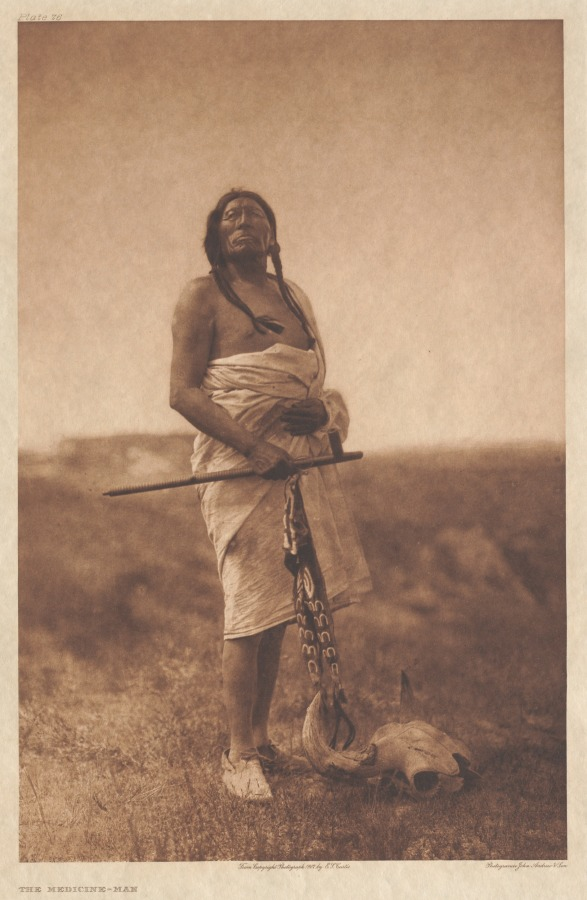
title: Portfolio III, Plates 76-110, 119, 136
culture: America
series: The North American Indian: being a series of volumes picturing and describing the Indians of the United States, The Dominion of Canada, and Alaska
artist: Edward S. Curtis (American, 1868–1952)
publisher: The University Press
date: 1904–8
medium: photogravure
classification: Portfolio